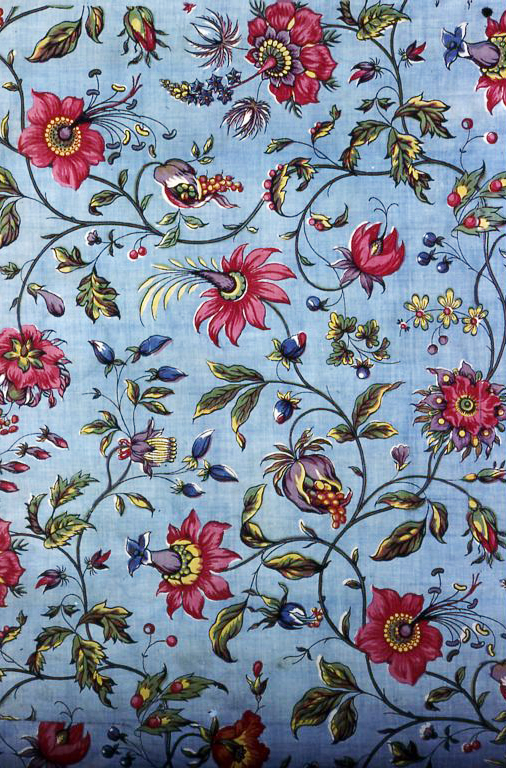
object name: Textile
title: Panel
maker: England or France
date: c. 1810/25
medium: Cotton, plain weave; block printed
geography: France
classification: textile; weaving - printed